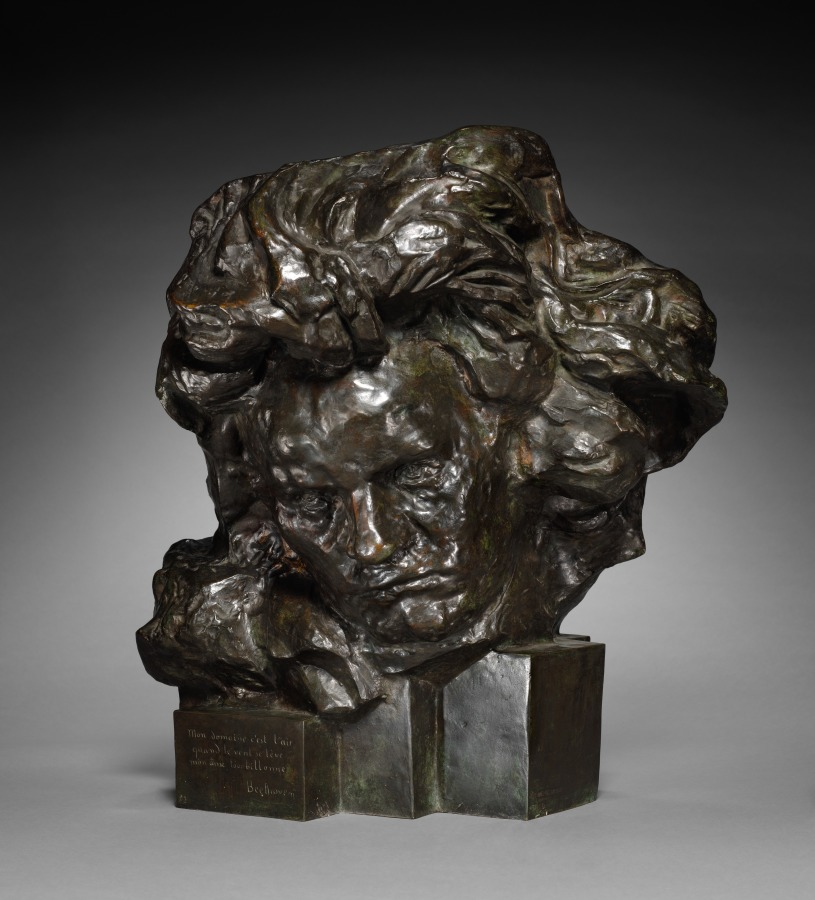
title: Head of Beethoven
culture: France, 19th century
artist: Emile Antoine Bourdelle (French, 1861–1929)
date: 1891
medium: bronze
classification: Sculpture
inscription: Signed left side: "Bourdelle / Sculpt."; inscribed right side: "FONRIENATLE DES BRONZES / J PETERMANN: ST GILLES BRUXELLES"; inscribed on front: "Mon domaine c'est l'air / quand le vent, se leve / mon âme tourbillonne / Beethoven"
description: A pioneer of modern sculpture, Antoine Bourdelle studied at the École des Beaux-Arts in Paris and worked as an assistant to Augustin Rodin, who greatly admired the younger artist’s work. In 1888 Bourdelle produced the first of a series of sculptural portraits of Ludwig van Beethoven, in which the artist orchestrated powerful billowing shapes to convey the creative spirit or genius of the composer. The artist inscribed a quote from Beethoven in the lower left: “My domain is the air; when the wind rises my soul swirls.”